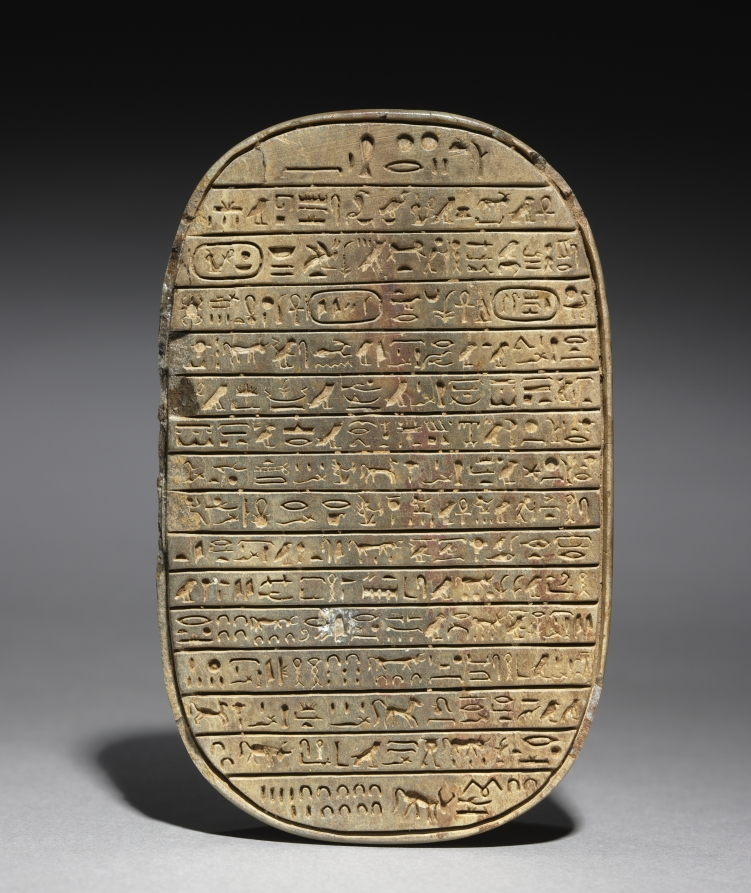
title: Wild Bull Hunt Scarab of Amenhotep III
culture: Egypt, New Kingdom (1540–1069 BCE), Dynasty 18, reign of Amenhotep III (1390–1352 BCE)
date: c. 1391–1353 BCE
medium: steatite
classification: Scarabs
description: Large commemorative scarabs are characteristic of Amenhotep III’s reign. About 200 are known, and all are inscribed with texts on their undersides, recording significant events in the life of the king and queen. This particular scarab is one of only 5 known examples that describe a royal bull hunt undertaken in his second year of rule, in which the king killed 96 bulls. More than just a pastime, the king’s success as a hunter symbolized the triumph of royal order over the forces of nature and chaos.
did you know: The variation in tone appears to be related to inclusions and pigmentation in the stone.